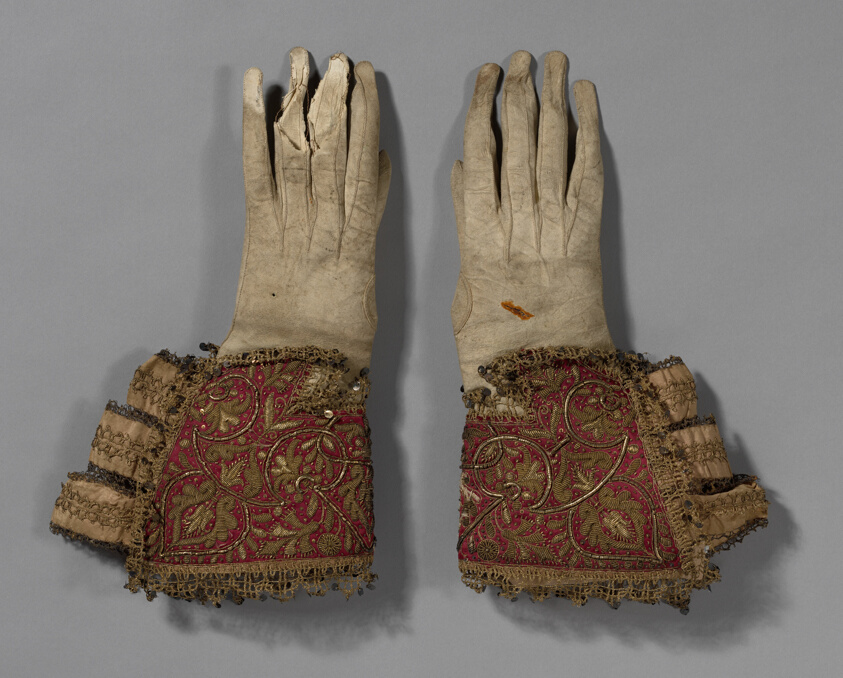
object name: Costume and Accessories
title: Pair of Men's Gloves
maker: England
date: 1600/50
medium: Gloves: leather; Gauntlets: silk, satin weave; embroidered with linen, gilt-metal-coiled wire and strips, and gilt-metal-strip-wrapped silk in couching and padded couching; ribbons of silk, plain weave; edged with gilt-metal-strip-wrapped silk, bobbin straight lace; metal spangles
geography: England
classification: textile; needlework (visual works); costume; costume accessory